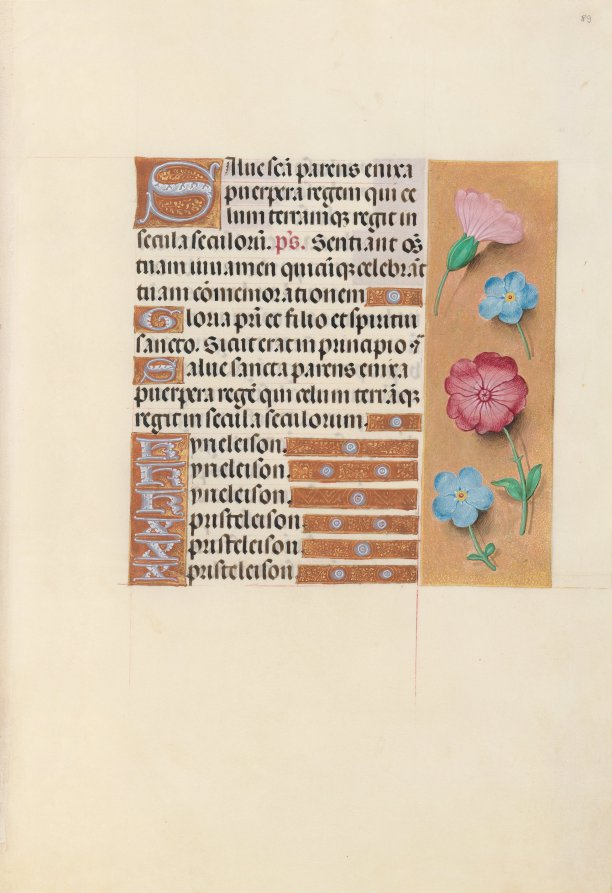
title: Hours of Queen Isabella the Catholic, Queen of Spain: Fol. 89r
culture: Flanders, Ghent and Bruges, late 15th century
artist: Master of the First Prayerbook of Maximillian (Flemish, c. 1444–1519)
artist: and Associates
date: c. 1500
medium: ink, tempera, and gold on vellum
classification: Bound Volume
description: This manuscript was illuminated by a circle of at least five highly organized manuscript painters active in the Flemish cities of Ghent and Bruges. The principal illuminator was Alexander Bening, who painted the majority of the book's miniatures. Manuscripts produced by this circle of artists are renowned for the decoration of their borders, which typically feature a rich variety of realistically-painted flowers, birds, and butterflies. This prayer book, called a book of hours, was intended not for a cleric, but for the private devotions of a lay person-in this case, Isabella the Catholic, Queen of Spain (1451-1504). Isabella's coat of arms embellishes the book's frontispiece. It is unlikely that the book was commissioned by the Queen herself; rather, she probably received it as a diplomatic gift from someone courting her patronage, perhaps Cardinal Francisco Jimenez de Cisneros. A Franciscan friar, Jimenez was dependent upon Isabella for his advancement, first to the post of Queen's confessor in 1492, and then to Archbishop of Toledo in 1495.